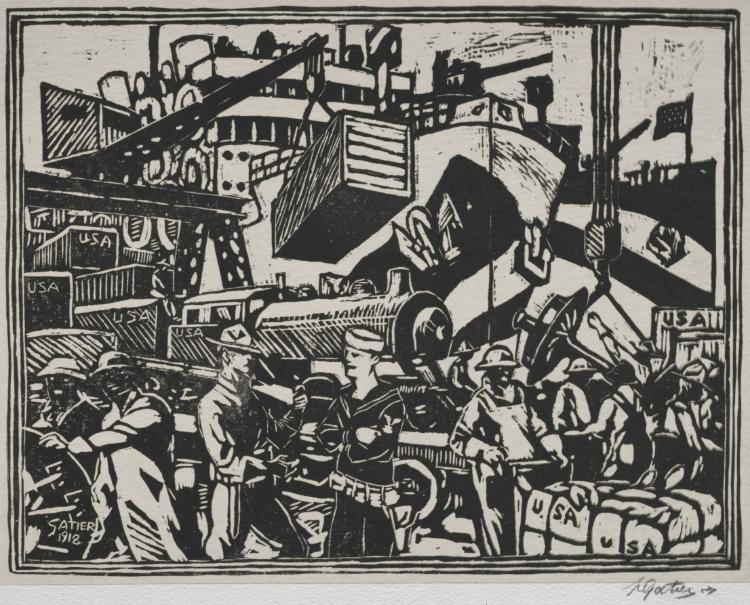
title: St. Nazaire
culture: France, 20th century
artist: Pierre Louis Gatier (French, 1878–1944)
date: 1918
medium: linoleum cut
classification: Print